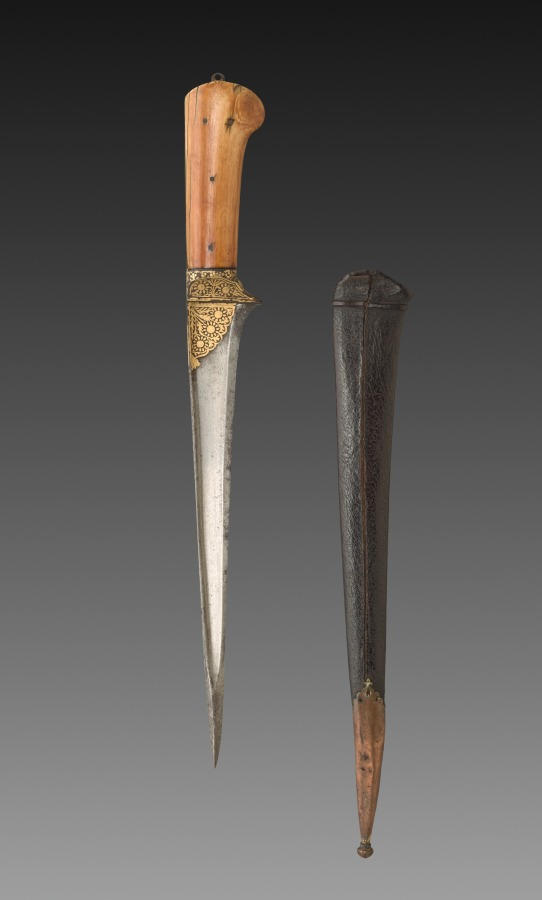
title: Dagger with Brown Leather Case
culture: India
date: 1700s–1800s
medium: silver inlay and leather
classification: Arms and Armor